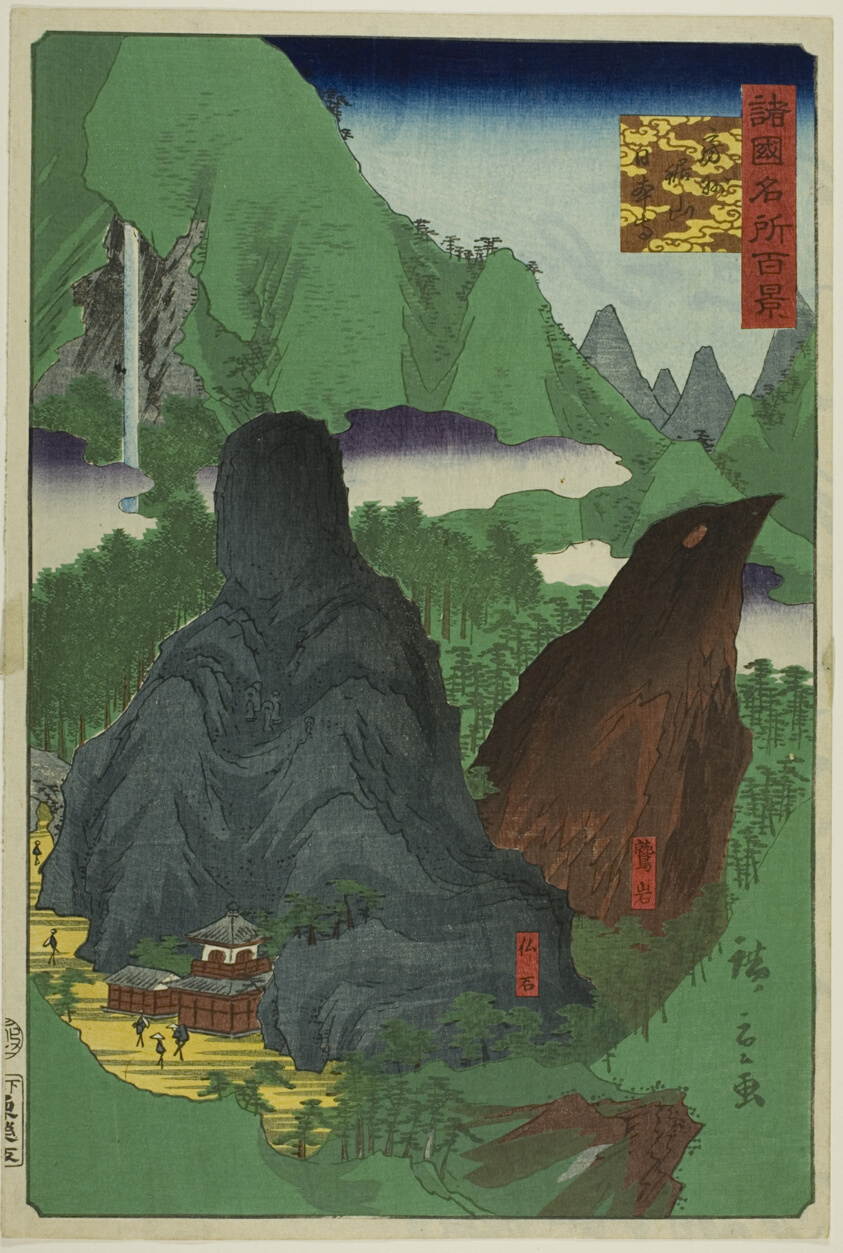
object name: Print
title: Nihon Temple on Mount Nokogiri, Boshu Province (Boshu Nokogiriyama Nihonji) from the series “One Hundred Famous Views in the Various Provinces (Shokoku meisho hyakkei)”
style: Japanese (culture or style)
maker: Utagawa Hiroshige II (Shigenobu) (Japanese, 1826–1869)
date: 1859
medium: Color woodblock print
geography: Japan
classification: woodblock print; print